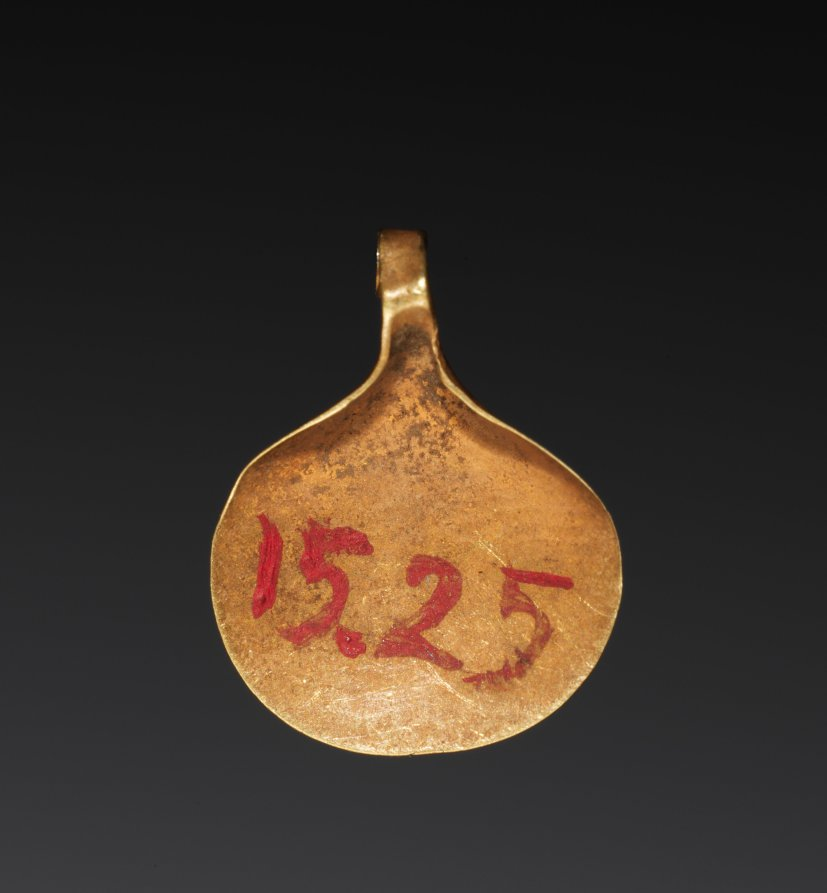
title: Bead in the Form of a Shell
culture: Egypt, Middle Kingdom (2040–1648 BCE)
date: 2040–1648 BCE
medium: gold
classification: Jewelry